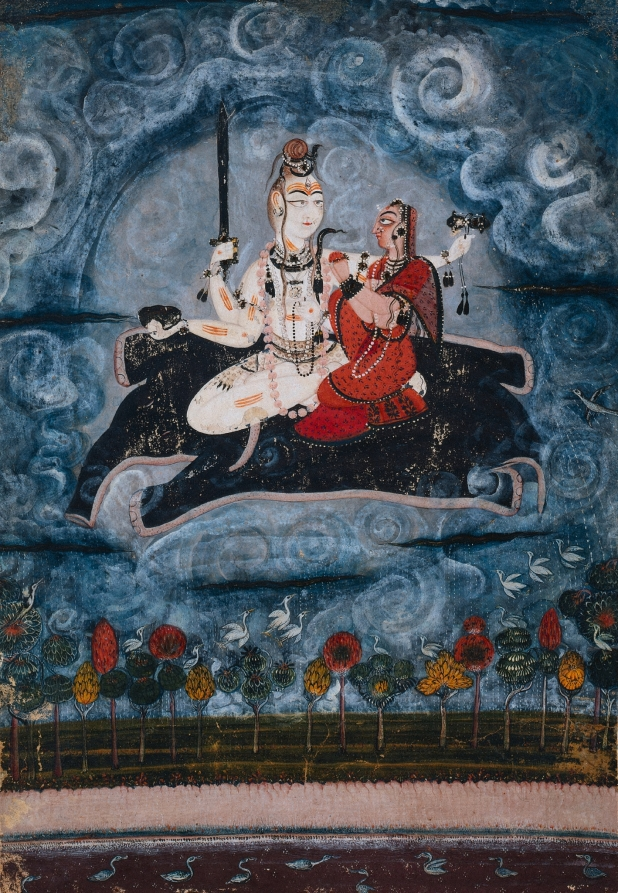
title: Shiva and Devi on Gajasura's hide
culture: Northern India, Pahari kingdoms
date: c. 1675–80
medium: Gum tempera and silver on paper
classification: Painting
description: These divine lovers embody the duality of opposites: male/female, yogi/princess, death/ birth, and destruction/creation. Their gazes are locked on each other, linking them in loving unity as they float on the skin of an elephant demon through swirling monsoon clouds above the earth. The god Shiva looks like a yogi with matted locks of hair entwined with serpents, white skin smeared with ash from funeral pyres, the third eye of true knowledge, triple-line sectarian marks, a garland of severed heads, and the leopard-skin loincloth. In three hands he holds emblems of destruction: skull cup, sword, and a drum that beats the rhythm of time. His fourth hand rests tenderly on the shoulder of his wife, the goddess Devi, also known as Parvati, who perches on his lap, her hands in a gesture of honor.